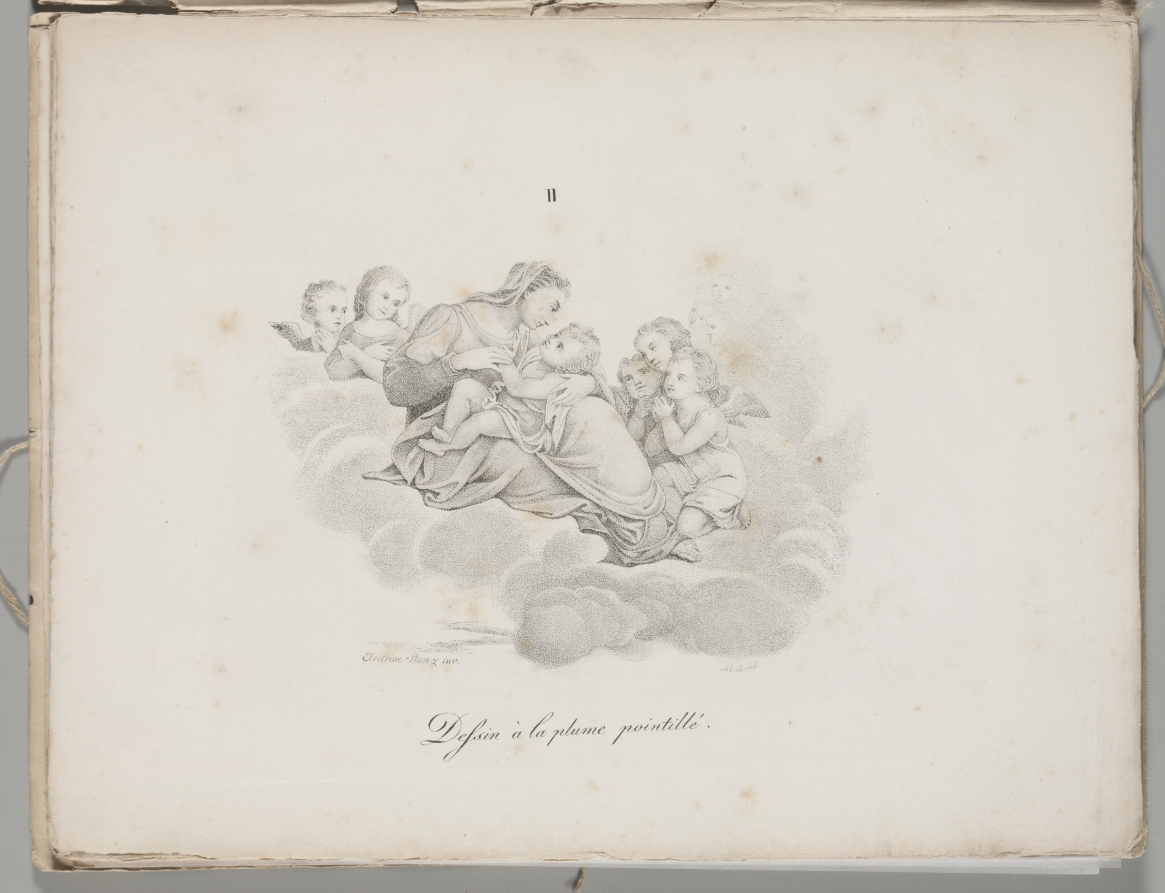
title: Art of the Lithograph: Madonna and Child on the Clouds, Plate II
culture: Germany, 19th century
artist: Alois Senefelder (German, 1771–1834)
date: 1819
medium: lithograph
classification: Portfolio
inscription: Written in plate: lower left: Electrine Stunz inv.; right: Al: S: del: center: Dessin à la plume pointillé; upper middle: II